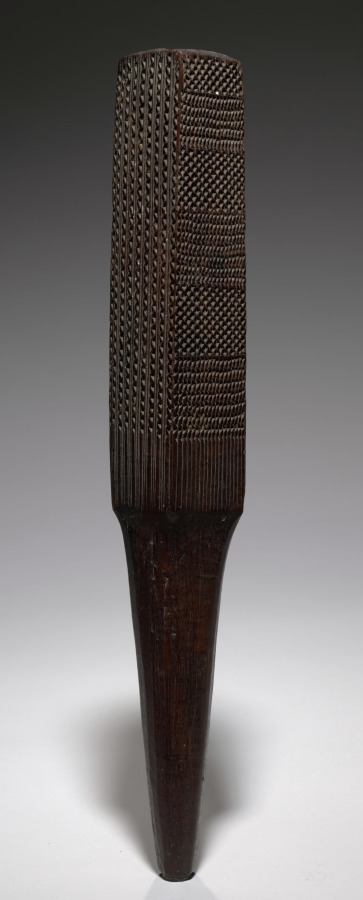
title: Tapa Cloth Beater (l'e kuku)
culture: Polynesia, Hawaii, 20th century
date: before 1930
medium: wood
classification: Sculpture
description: To make tapa, a decorated bark cloth, Hawaiian women used the four-sided beater to pound the inner bark of the paper mulberry tree, softened by a week of soaking in sea water. The cloth was beaten in several stages, starting with the most coarsely grooved side of the mallet and gradually reaching the finest grooved side. Although many Polynesian groups produced tapa cloth, only Hawaiian tapa cloth beaters were incised with a variety of "watermark" patterns. The prepared cloth was decorated with overlaying, cord snapping, free-hand painting, and printing techniques.